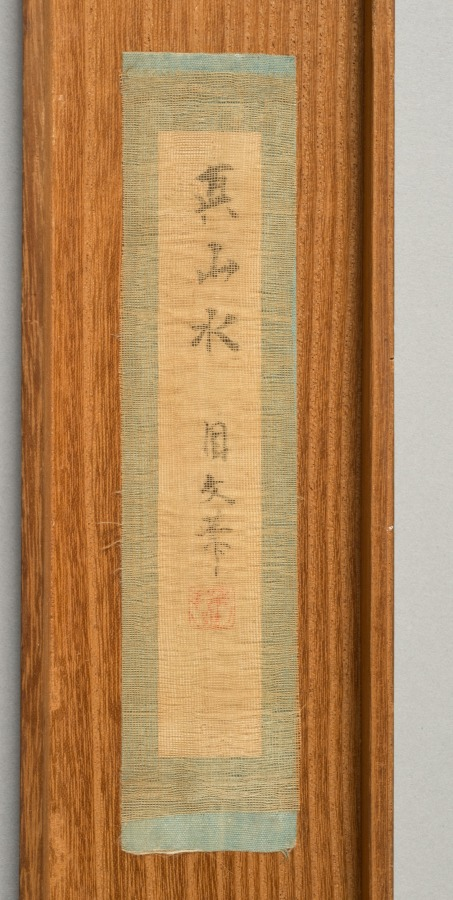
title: Lonely Temple and Towering Cliff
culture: Japan, Muromachi period (1392–1573)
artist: circle of Kenkō Shōkei (Japanese, active 1478–1506)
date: c. 1480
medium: hanging scroll; ink and slight color on paper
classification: Painting